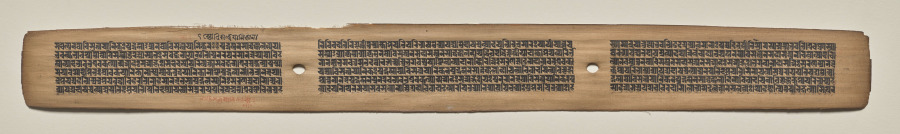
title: Text, Folio 148 (recto), from a Manuscript of the Perfection of Wisdom in Eight Thousand Lines (Ashtasahasrika Prajnaparamita-sutra)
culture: Eastern India, Bihar, Vikramashila Monastery. Painting: Nepal, Kathmandu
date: Sunday, September 14, 1119 (year 239 of the Newar Samvat in the month of Ashvina)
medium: gum tempera and ink on palm leaves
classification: Painting